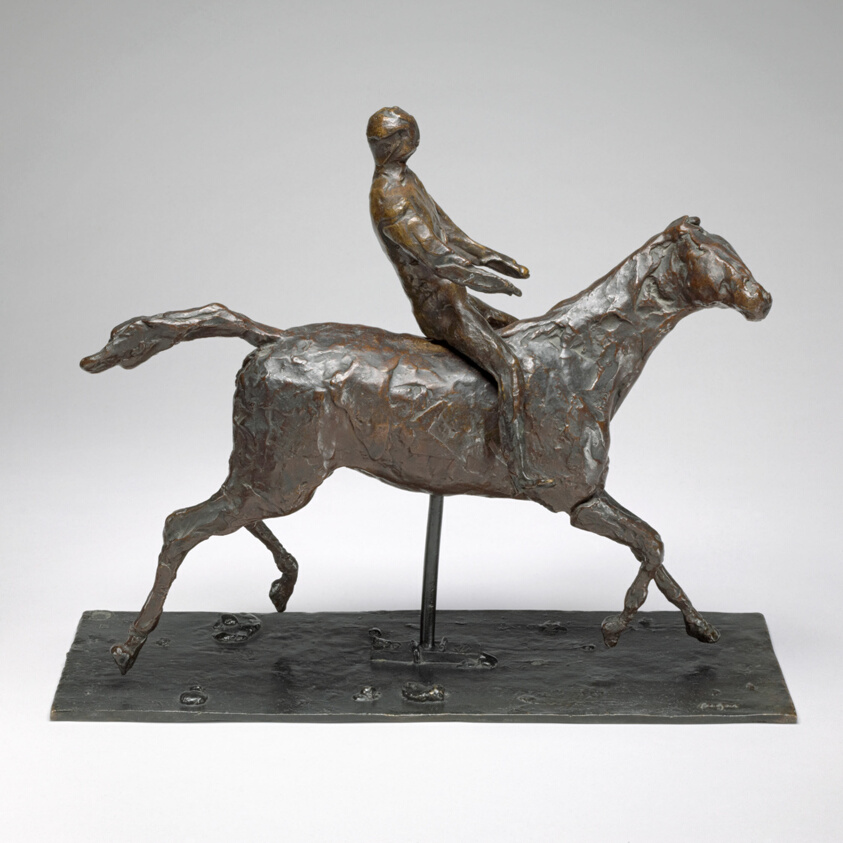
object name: Sculpture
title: Horse with Jockey; Horse Galloping, Turning Head to the Right, Feet Not Touching the Ground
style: Impressionism, nineteenth century, 20th Century, 19th century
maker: Edgar Degas (French, 1834–1917)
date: Modeled mid–1870s, cast before 1951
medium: Bronze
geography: France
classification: sculpture; french; figure; bronze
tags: horse, race, model, man, figure, animals